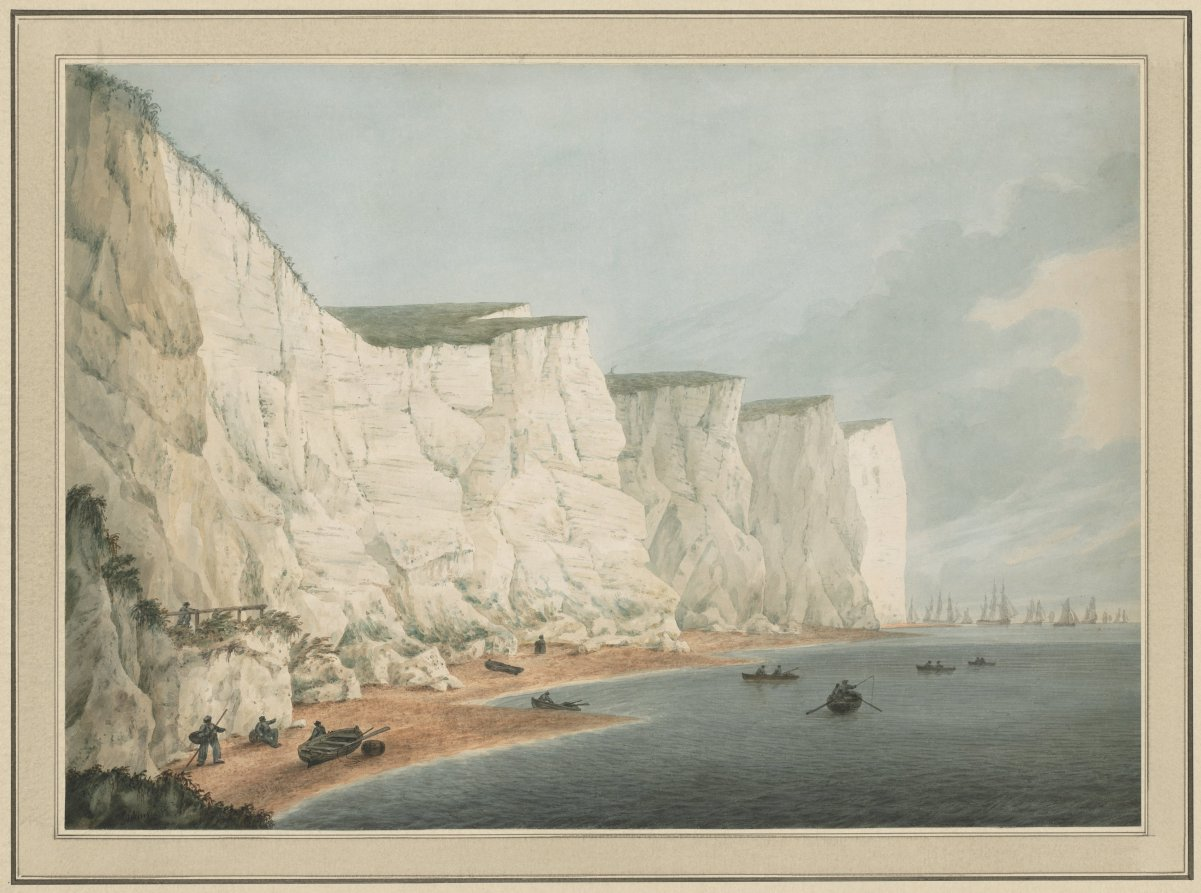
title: The Fleet Off the Coast, Beachy Head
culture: England, 18th century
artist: Samuel Atkins (British, 1760–1810)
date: c. 1790–1805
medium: watercolor with graphite underdrawing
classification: Drawing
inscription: signed, at lower left, in brown ink: Atkins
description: This watercolor depicts the breathtaking headlands of Beachy Head, the highest, most dramatic chalk sea cliffs in the United Kingdom. A marine painter active during the French Revolutionary and Napoleonic Wars, Samuel Atkins patriotically associated Britain’s identity with its coastal geography and famous navy. A fleet of sailing vessels is seen in the distance in full sail, suggesting a rare moment of the entire fleet’s departure.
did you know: Beachy Head, the site depicted in this drawing, worked its way into popular culture and literature around the time that Samuel Atkins made the work, including a song of the Royal Navy and a poem by Charlotte Turner Smith, a contemporary of the artist.